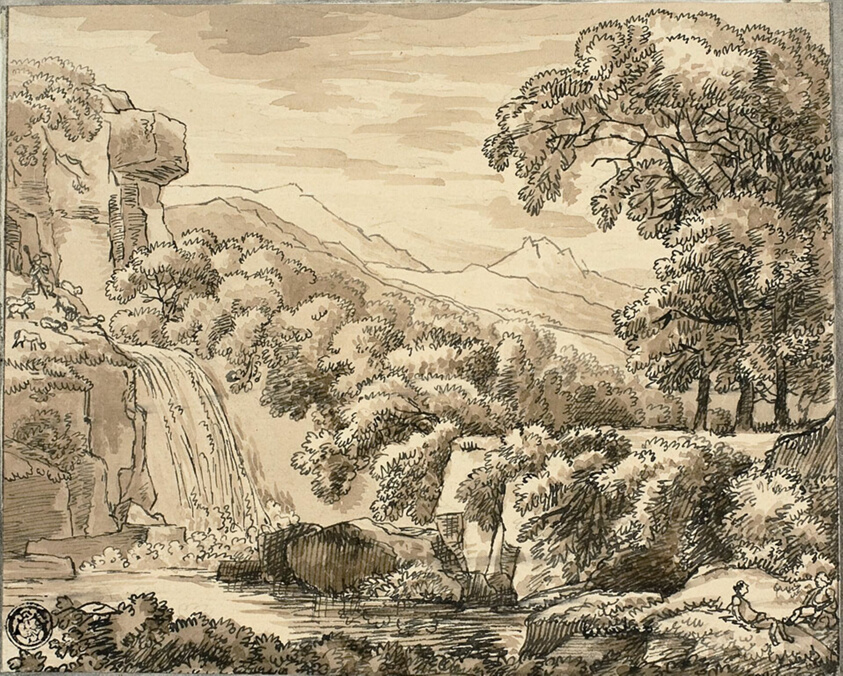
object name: Drawing and Watercolor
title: Mountain Landscape with Waterfall and Figures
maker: Carl August Lebschée (German, 1800-1877)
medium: Pen and black ink and brush and brown wash, over graphite, on cream laid paper, tipped onto ivory laid paper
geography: Germany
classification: pen and ink drawings; drawings (visual works); prints and drawing